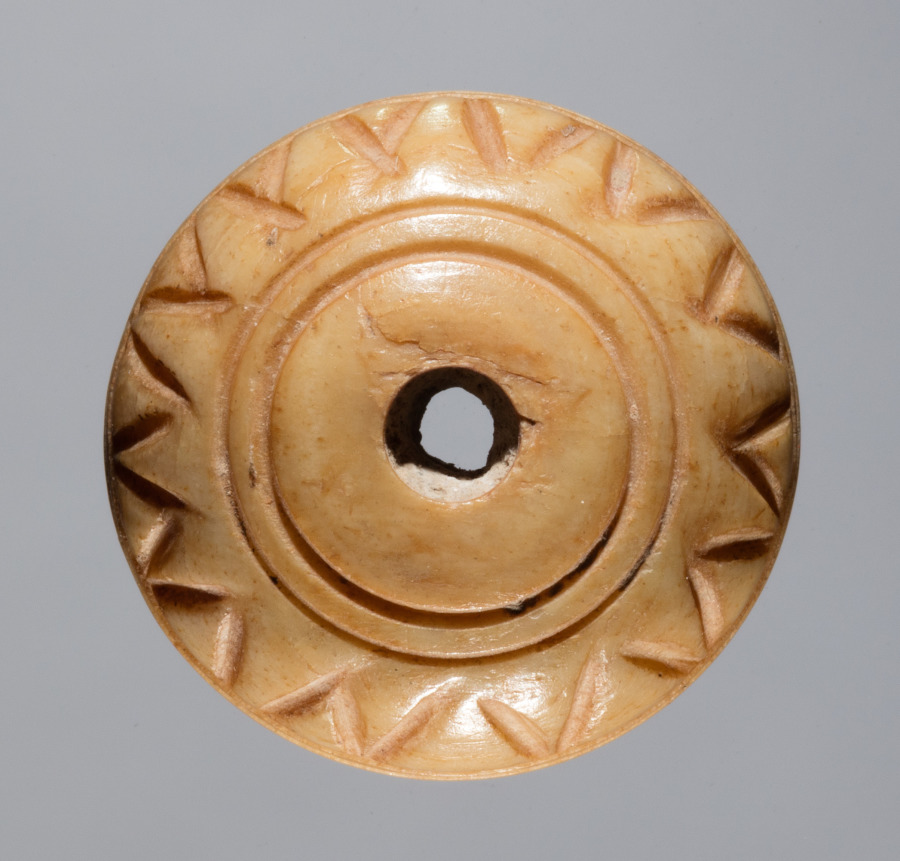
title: Spindle Whorl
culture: Iran, early Islamic period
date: 700s - 900s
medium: bone, incised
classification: Spindle Whorl